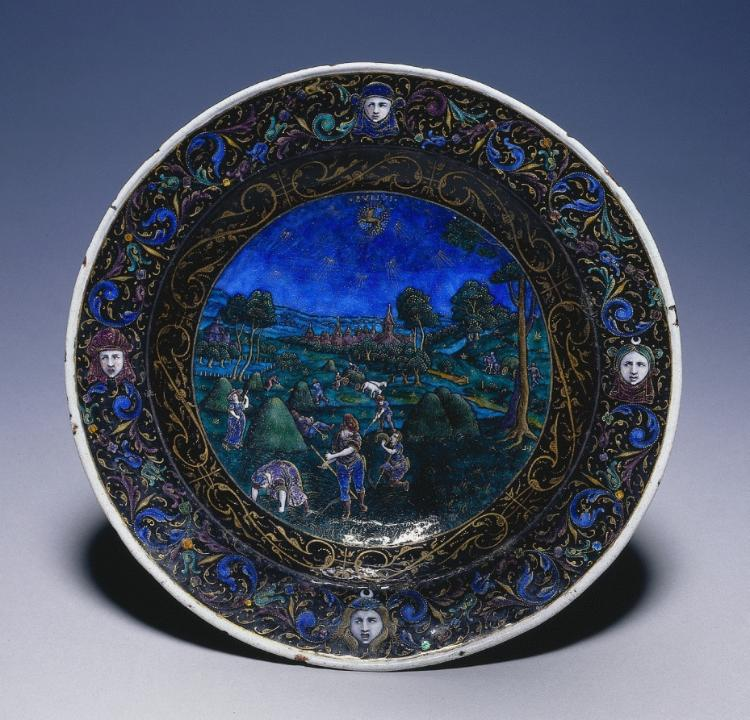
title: Plate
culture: France, Limoges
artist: Jean Limousin (French, 1528–c. 1610)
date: 1500s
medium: painted enamel on copper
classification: Enamel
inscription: signed at left under tree roots: i. L.; written at top center: IVLIVS